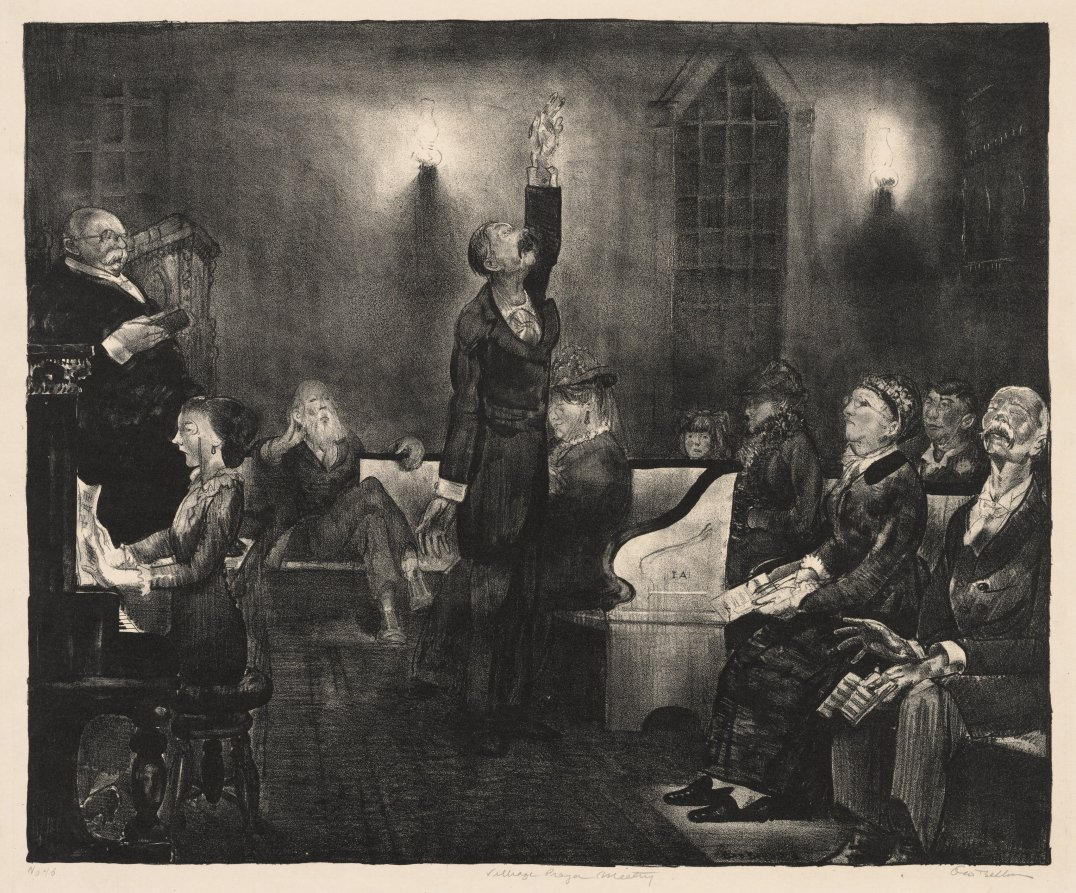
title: Prayer Meeting, Second Stone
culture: America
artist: George Bellows (American, 1882–1925)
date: 1916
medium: lithograph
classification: Print